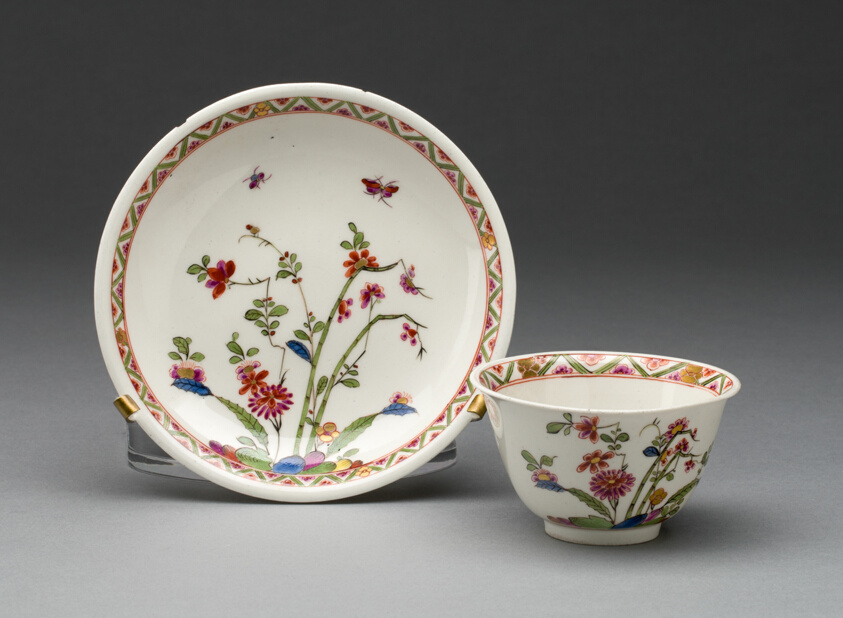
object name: Ceramics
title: Cup and Saucer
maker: Du Paquier Porcelain Manufactory (Austrian, 1718-1744)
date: c. 1725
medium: Hard-paste porcelain with polychrome enamels and gilding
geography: Vienna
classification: drinking vessel; porcelain; european decorative arts; ceramics